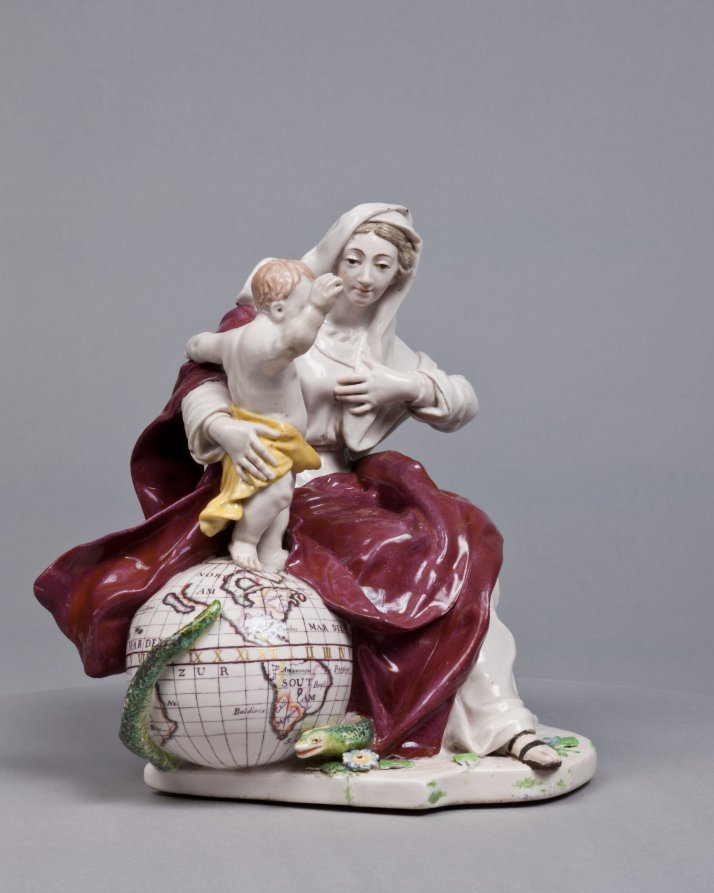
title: Madonna and Child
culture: England, Chelsea, 18th century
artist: Chelsea Porcelain Factory (Britain, London, 1745–84)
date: c. 1755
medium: porcelain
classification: Ceramic